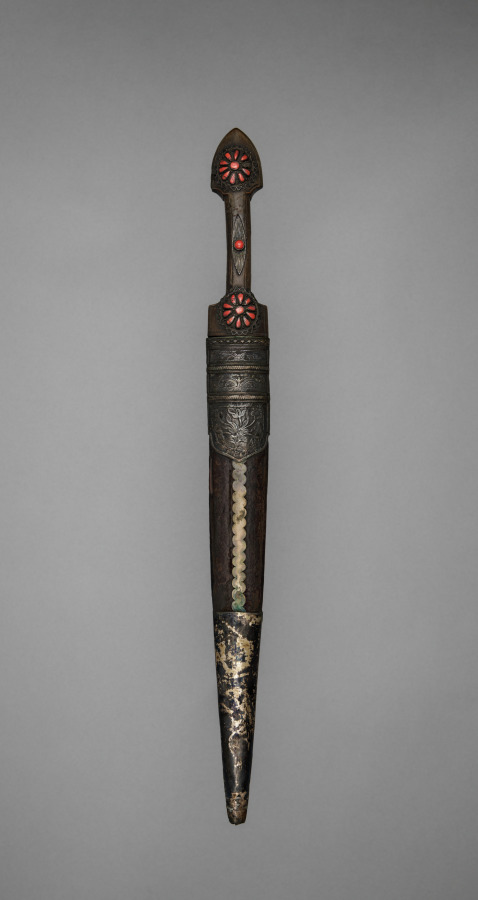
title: Dagger (Khanjali) with Scabbard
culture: Transcaucasian, Georgian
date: 1700s–1800s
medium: carnelian?, steel, wood handle, copper alloy, and silver gilt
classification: Arms and Armor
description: A khanjali is a dagger popular with the inhabitants of Georgia and the rest of the Caucasus since ancient times. They often have a single offset groove on each face of the blade and the shape is similar to the ancient Roman gladius and the Scottish dirk.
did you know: Scabbards for daggers like these are usually highly engraved with gold or silver designs and can sometimes include embedded gemstones.